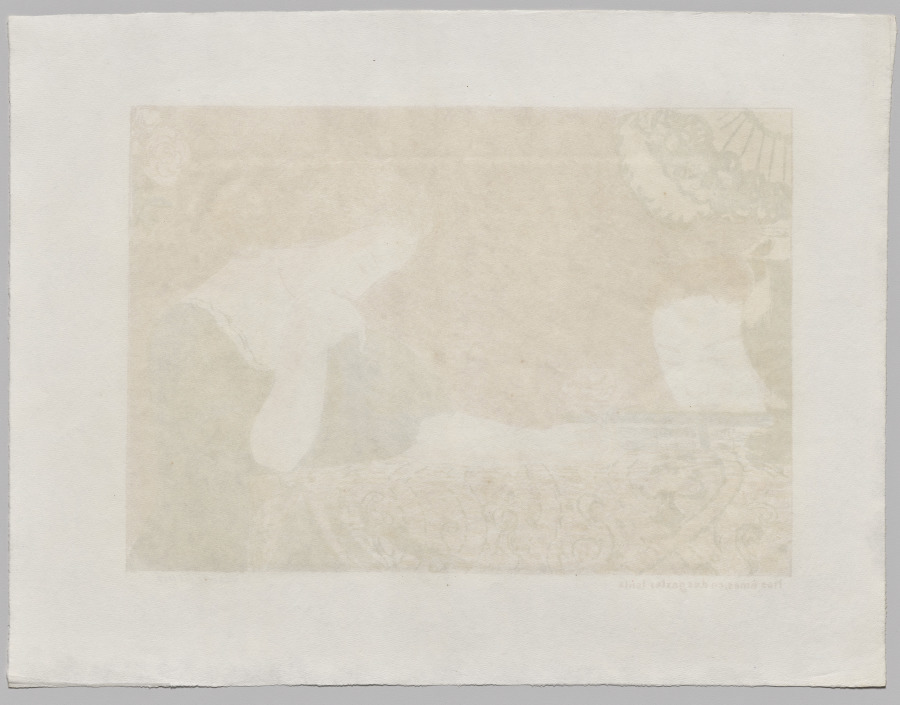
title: Our Souls, in Languorous Gestures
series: Love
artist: Maurice Denis (French, 1870–1943)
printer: August Clot (French, 1858–1936)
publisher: Ambroise Vollard (French, 1867–1939)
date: 1899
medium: color lithograph on wove paper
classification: Print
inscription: Recto, lower left: “Nos ames, en des gestes lents”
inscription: In graphite, recto, lower right: “Maurice Denis (signed)”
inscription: In graphite, recto, lower left: “41”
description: Maurice Denis belonged to the Nabis, a group of artists who came together in 1889 to pursue a radical new style informed by subjective experience and emotion. This print is from a series in which Denis explored his devotion to his wife, Marthe, by depicting her in a variety of settings alongside titles drawn from his own journal. The vague but evocative images were meant to encourage the viewer to draw connections to the theme and meditate on its meaning.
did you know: Maurice Denis was a devout Catholic and often drew visual connections between his wife, Marthe, the subject of this print series, and the Virgin Mary.